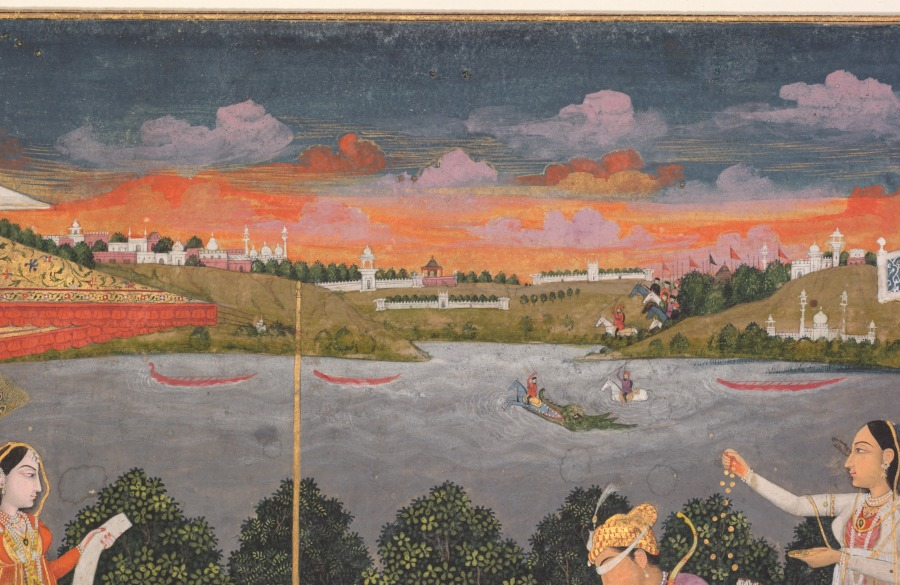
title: A blindfolded suitor is brought before a princess (recto)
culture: India, Lucknow, Mughal, 18th century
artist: Fayzullah (Indian, active c. 1730–1765)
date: 1755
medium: Gum tempera and gold on paper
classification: Painting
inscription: signed in two places: on capital of central pillar: 'amal - i Fayzullah ("the workof Fayzullah"), and below: bi - qalam i Fayzullah Musavvir walad - i Faqirullah Musavvir dar sanna 1755 ("by the pen of Fayazullah the painter son of Faqirullah the painter in the the year 1755")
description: In a scene set on a carpeted terrace in the women’s palace quarters, an older woman of the harem drags a young prince with a white blindfold over his eyes before a princess grasping a document. Such a scene evokes a literary allusion of a princess who selects her suitor, but it also resonates with circumstances at the Mughal court. Signed and dated by the artist, this painting was completed at a time when powerful women wielded control over the emperor, and Ahmad Shah Bahadur (reigned 1748–54), son and successor of Muhammad Shah, had been blinded and deposed less than one year before.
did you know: A gigantic crocodile swallows a horse and rider attempting to cross the river.